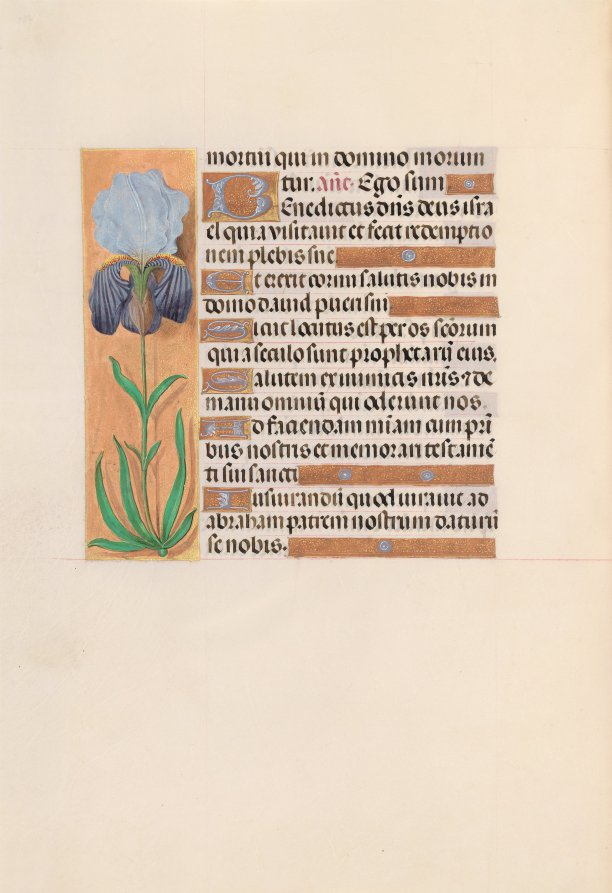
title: Hours of Queen Isabella the Catholic, Queen of Spain: Fol. 254v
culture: Flanders, Ghent and Bruges, late 15th century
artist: Master of the First Prayerbook of Maximillian (Flemish, c. 1444–1519)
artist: and Associates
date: c. 1500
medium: ink, tempera, and gold on vellum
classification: Bound Volume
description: This manuscript was illuminated by a circle of at least five highly organized manuscript painters active in the Flemish cities of Ghent and Bruges. The principal illuminator was Alexander Bening, who painted the majority of the book's miniatures. Manuscripts produced by this circle of artists are renowned for the decoration of their borders, which typically feature a rich variety of realistically-painted flowers, birds, and butterflies. This prayer book, called a book of hours, was intended not for a cleric, but for the private devotions of a lay person-in this case, Isabella the Catholic, Queen of Spain (1451-1504). Isabella's coat of arms embellishes the book's frontispiece. It is unlikely that the book was commissioned by the Queen herself; rather, she probably received it as a diplomatic gift from someone courting her patronage, perhaps Cardinal Francisco Jimenez de Cisneros. A Franciscan friar, Jimenez was dependent upon Isabella for his advancement, first to the post of Queen's confessor in 1492, and then to Archbishop of Toledo in 1495.